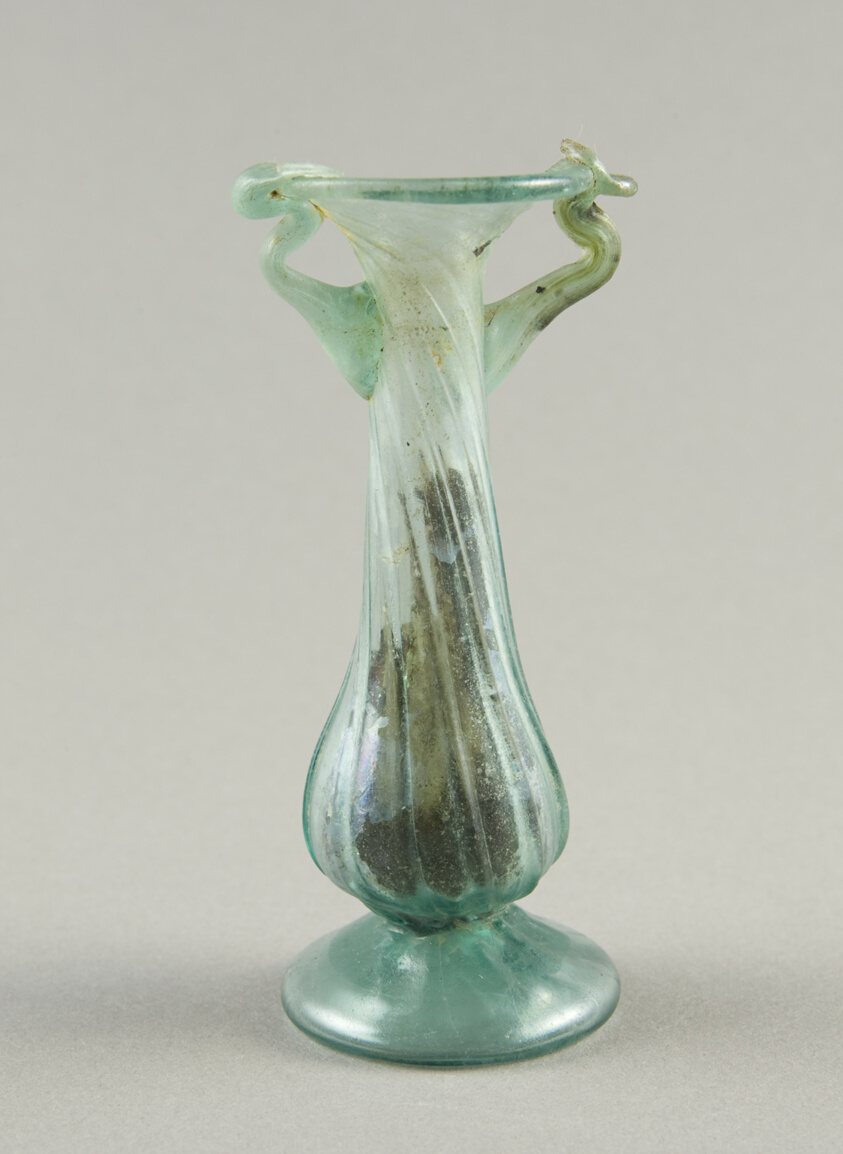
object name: Vessel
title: Bottle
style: syrian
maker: Roman; Levant or Syria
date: 4th-5th century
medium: Glass, blown technique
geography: Syria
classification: bottle; glass; vessel; ancient art